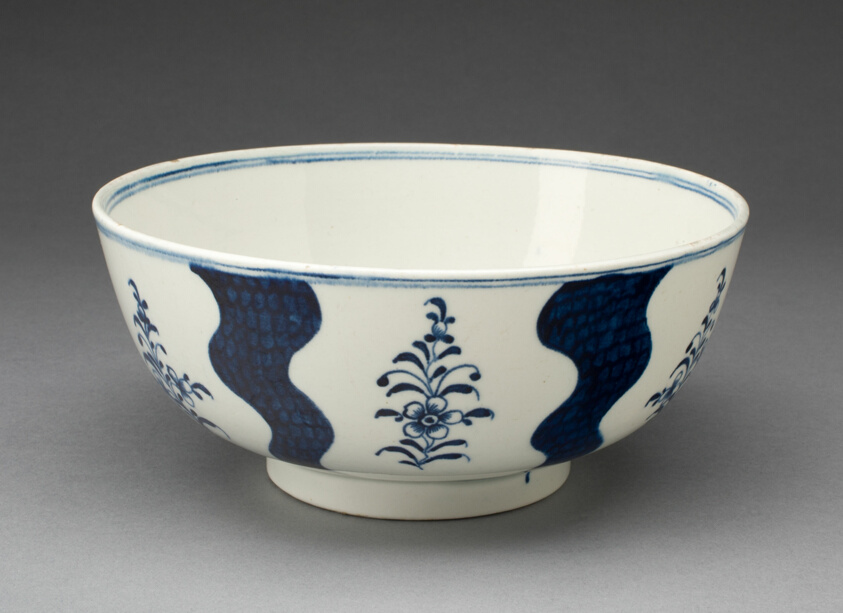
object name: Ceramics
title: Bowl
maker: Worcester Porcelain Factory (Warmstry House Period, 1751–1783); Worcester, England, founded 1751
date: c. 1775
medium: Soft-paste porcelain, underglaze blue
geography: Worcester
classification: bowl; dish (vessel); ceramics; european decorative arts; porcelain